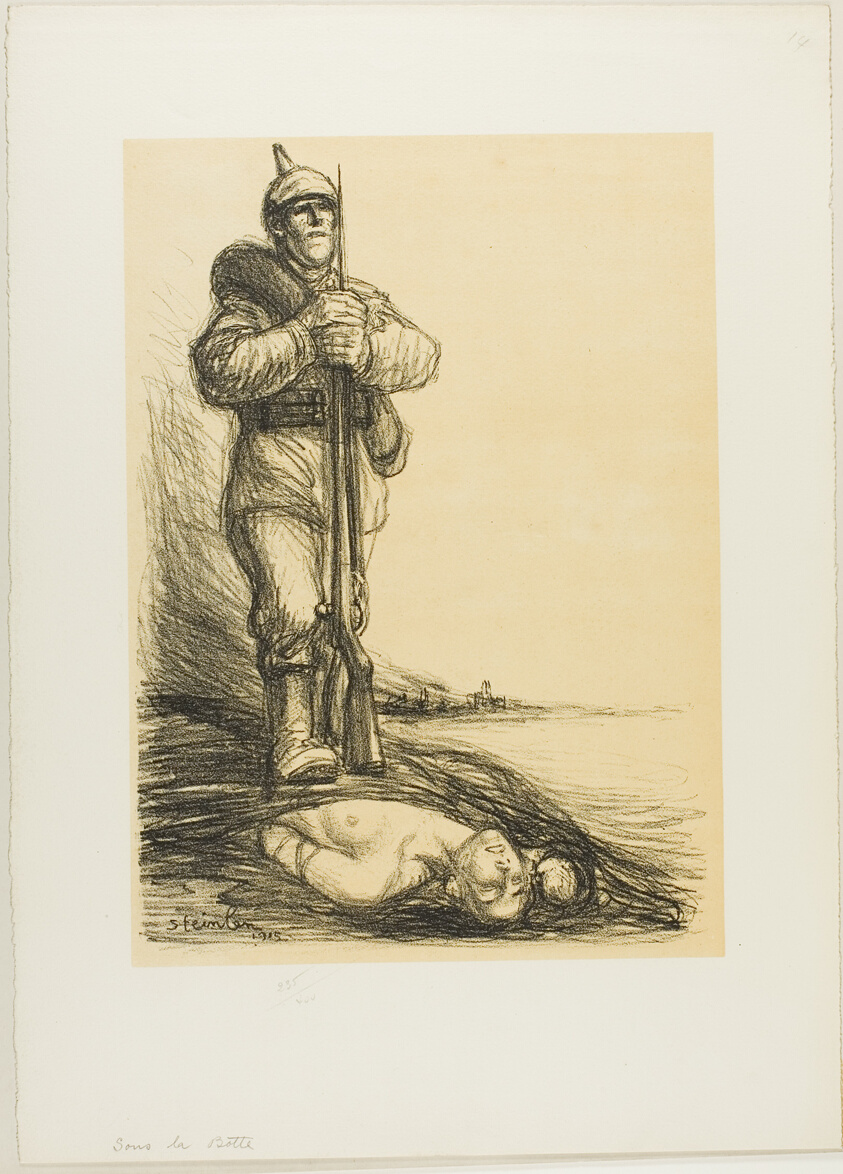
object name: Print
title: Under the Boot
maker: Théophile-Alexandre Steinlen; French, born Switzerland, 1859-1923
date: 1915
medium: Lithograph in black over fawn tint on thick off-white wove paper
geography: France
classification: lithograph; print; prints and drawing